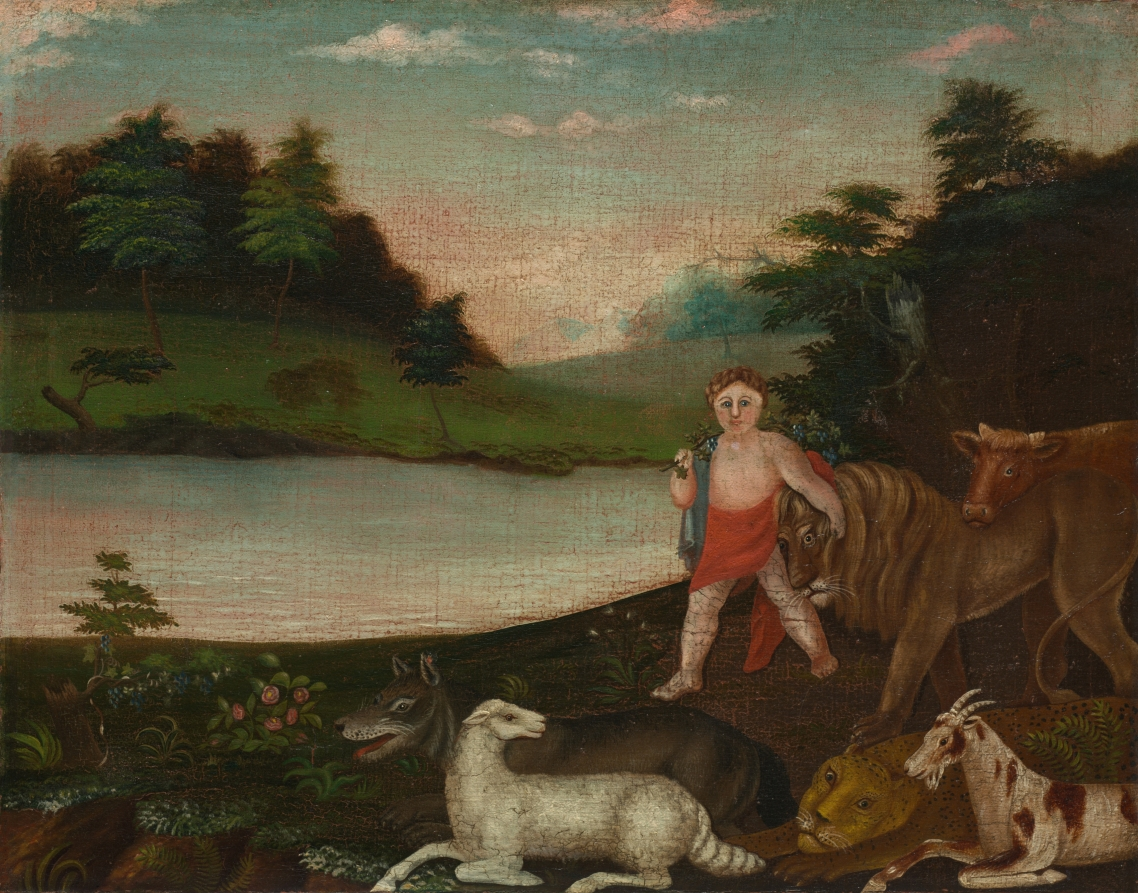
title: The Peaceable Kingdom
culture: America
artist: Edward Hicks (American, 1780–1849)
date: c. 1816–18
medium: oil on canvas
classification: Painting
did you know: Hicks painted more than 60 versions of the Peaceable Kingdom, and this example is likely the first.